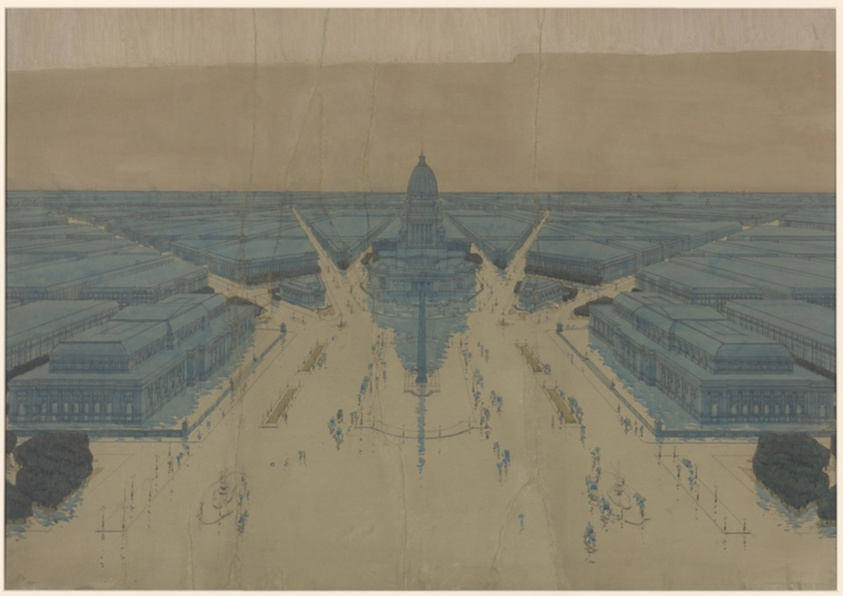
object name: Architectural Drawing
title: View of the Proposed Civic Center Plaza and Buildings, The 1909 Plan of Chicago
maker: Daniel Hudson Burnham, American, 1846-1912; Edward Herbert Bennett, American, born England, 1874-1954; Jules Guerin, delineator, American, 1866-1946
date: 1908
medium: Graphite and watercolor on paper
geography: Chicago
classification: graphite; architectural drawing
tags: Chicago, architecture